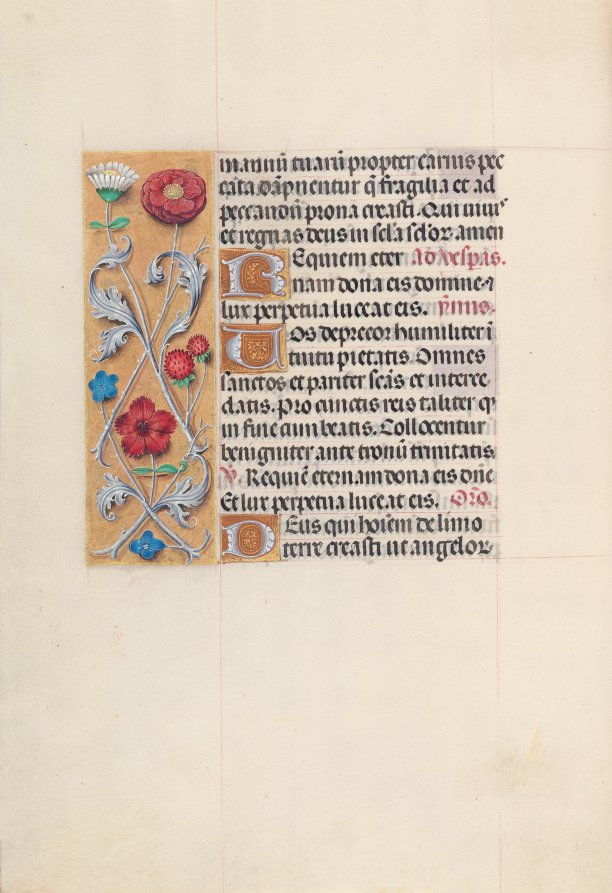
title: Hours of Queen Isabella the Catholic, Queen of Spain: Fol. 28v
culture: Flanders, Ghent and Bruges, late 15th century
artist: Master of the First Prayerbook of Maximillian (Flemish, c. 1444–1519)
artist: and Associates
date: c. 1500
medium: ink, tempera, and gold on vellum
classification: Bound Volume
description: A great lover of Flemish art, Queen Isabella treasured her many devotional books. This deluxe manuscript was created for her private devotions by highly organized and distinctly talented manuscript painters active in Ghent and Bruges. The Ghent-Bruges school represents the culmination of Flemish book painting, whose main features were the use of rich colors, illusionistic effects, a love of landscape, and a strong sense of visual narrative. Manuscripts produced by this circle of artists are renowned for their border decoration featuring a rich variety of realistically painted flowers, scrolling acanthus leaves, birds, and butterflies.